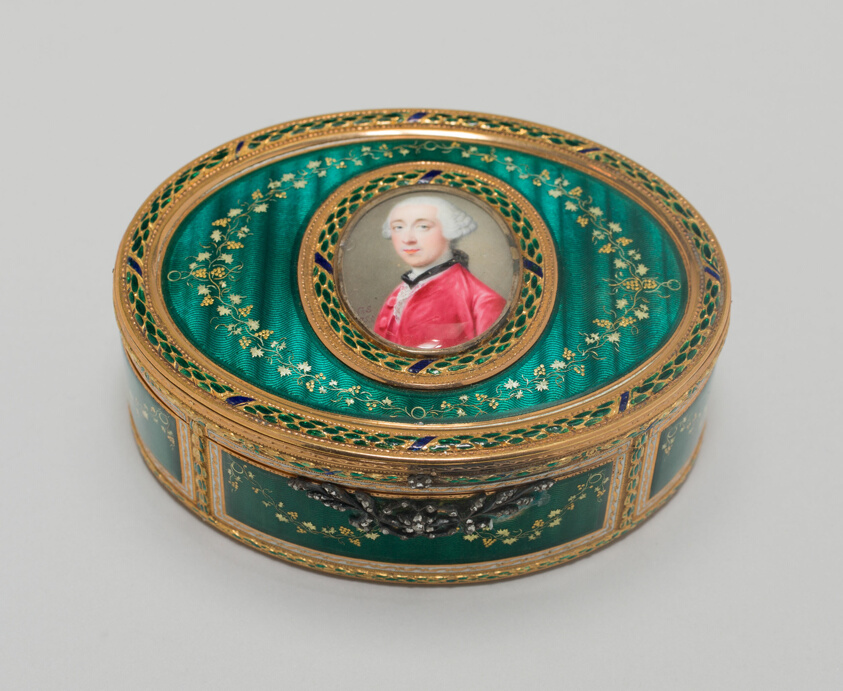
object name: Metalwork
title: Box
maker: Paris, France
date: 1768/75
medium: Gold, enamel, and brilliants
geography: Paris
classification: accessories (object genre); european decorative arts; metalwork